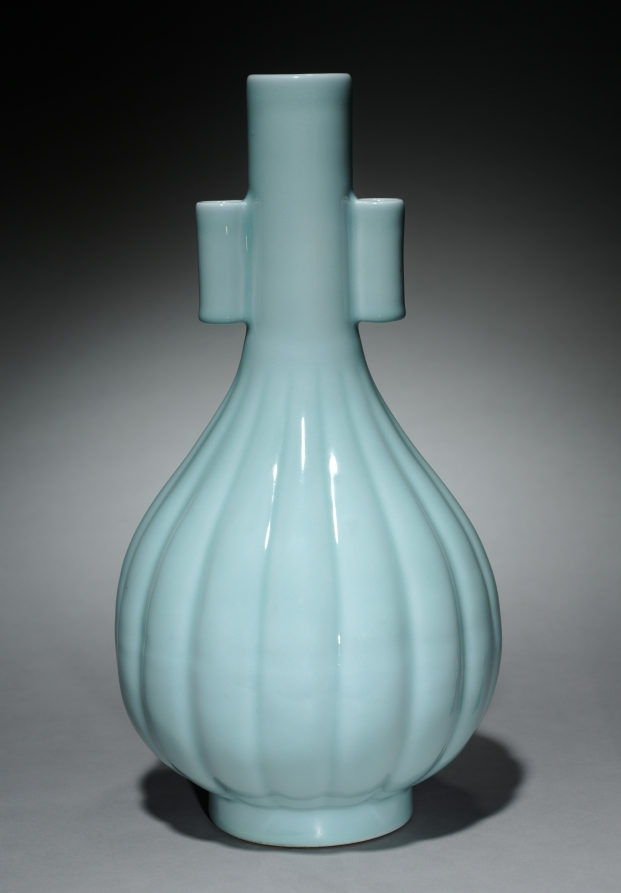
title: Melon-Shaped Fluted Vase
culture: China, Jiangxi province, Jingdezhen kilns, Qing dynasty (1644-1911), Qianlong mark and reign (1736-95)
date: 1736–95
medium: porcelain with clair-de-lune glaze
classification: Ceramic